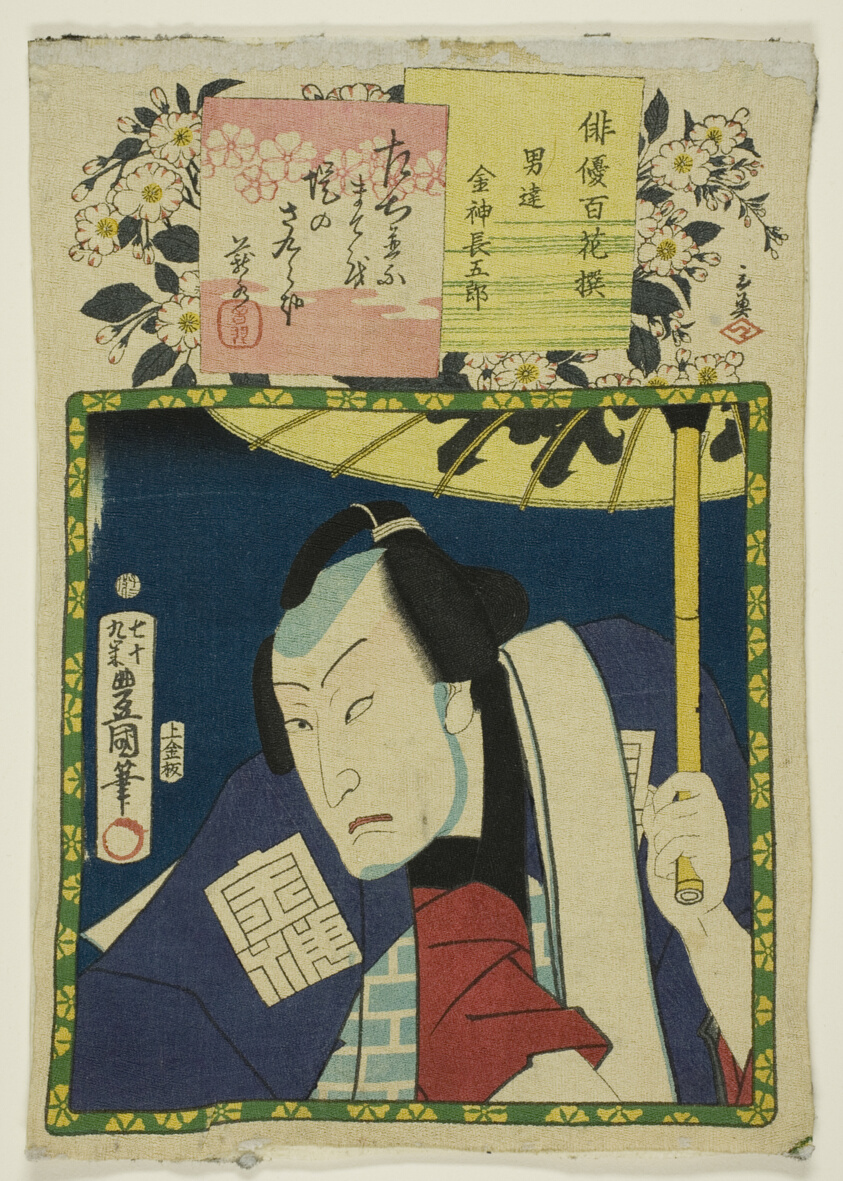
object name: Print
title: The actor Bando Hikosaburo V as Konjin Chogoro, from the series "One Hundred Selected Actors (Haiyu hyakkasen)"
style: Japanese (culture or style)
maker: Utagawa Kunisada I (Toyokuni III) (Japanese, 1786-1864)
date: 1864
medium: Color woodblock print; chirimen-e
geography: Japan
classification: woodblock print; print; asian art